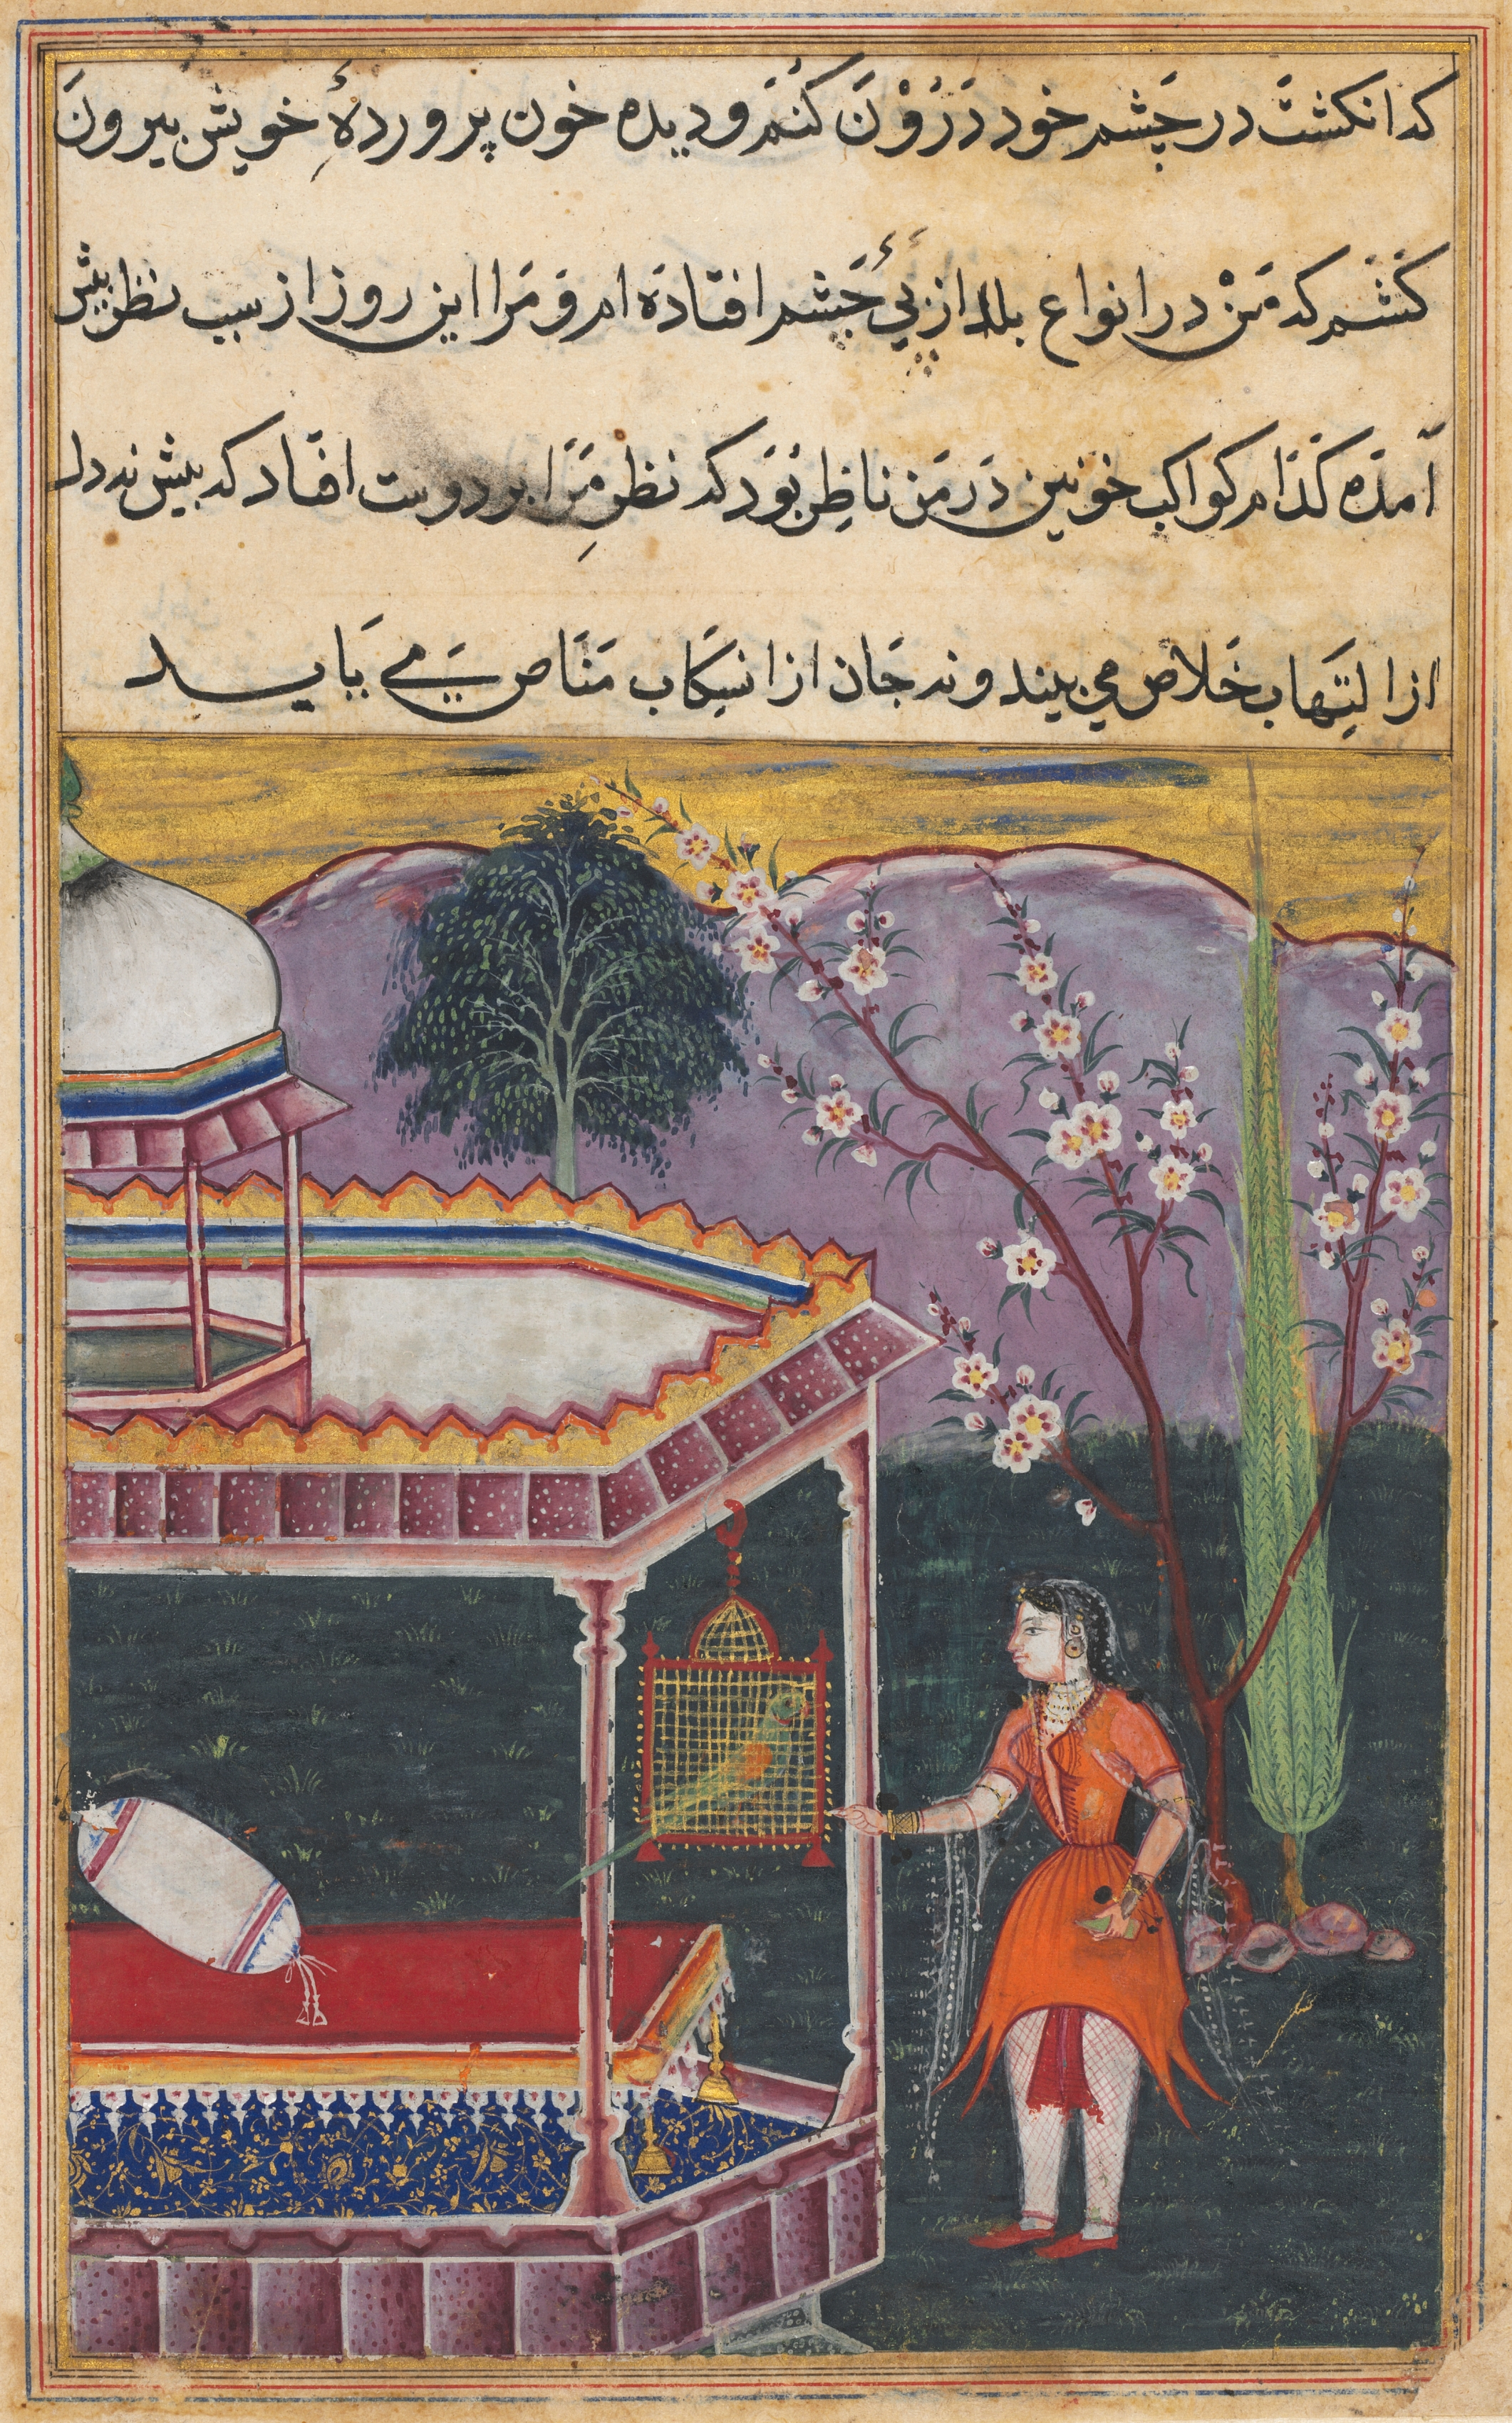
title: Page from Tales of a Parrot (Tuti-nama): text page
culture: Mughal India, court of Akbar (reigned 1556–1605)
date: c. 1560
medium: gum tempera, ink, and gold on paper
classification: Painting